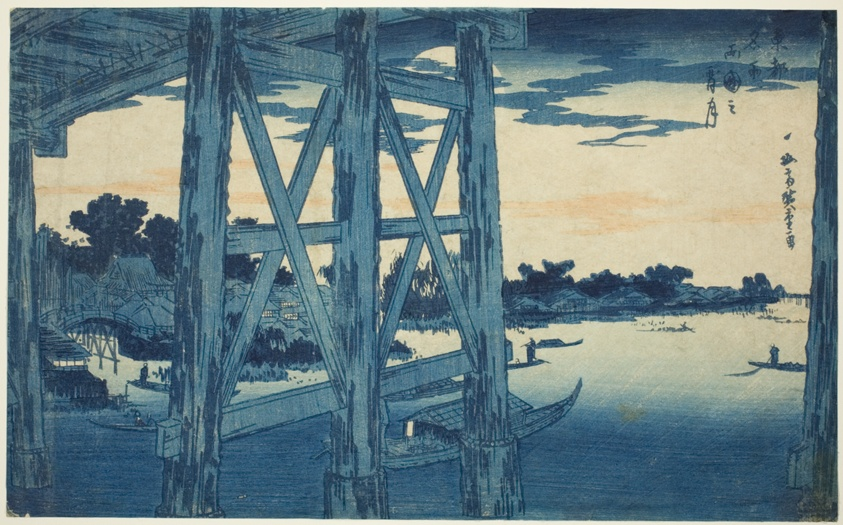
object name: Print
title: Twilight Moon at the Ryogoku Bridge (Ryogoku no yoizuki), from the series "Famous Views of the Eastern Capital (Toto meisho)"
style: Japanese (culture or style)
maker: Utagawa Hiroshige 歌川 広重; Japanese, 1797-1858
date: c. 1831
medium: Color woodblock print; oban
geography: Japan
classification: woodblock print; print; asian art